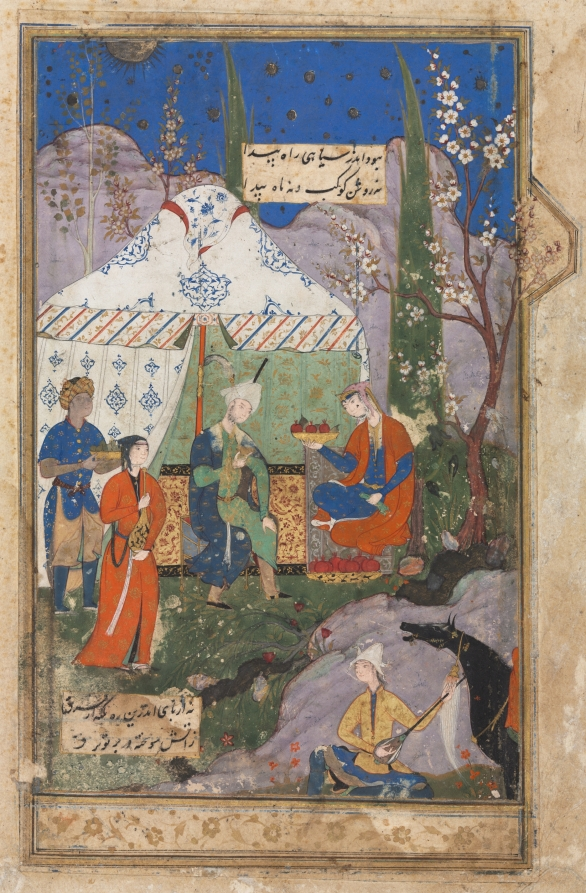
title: An Episode from the Story of the Sasanian King Khusrau and His Beloved Shirin, from a Khamsa (Quintet) of Nizami (1141–1209) (verso)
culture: Iran, probably Shiraz, Safavid period (1501-1722)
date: 1540–70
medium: opaque watercolor, ink, gold, and silver on paper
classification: Manuscript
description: The Khamsa is a collection of five narrative poems, one of which is dedicated to the romance of Khusrau Parviz (590–628), a Sasanian king of Iran, and Shirin, his beloved Armenian princess. The lovers are seated in a nocturnal landscape, indicated by the dark blue sky dotted with stars, painted with now tarnished silver. Shirin serves figs and pomegranates, symbolic of fertility, to Khusrau as attendants bring more figs and wine. Next to Shirin’s black horse, the musician at bottom right plays a tanbur, a long-necked, fretted lute.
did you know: Khusrau’s turban has the anachronistic baton worn by Safavid royalty and the egret feather, an emblem of nobility instituted by the Mongols in the 1200s.